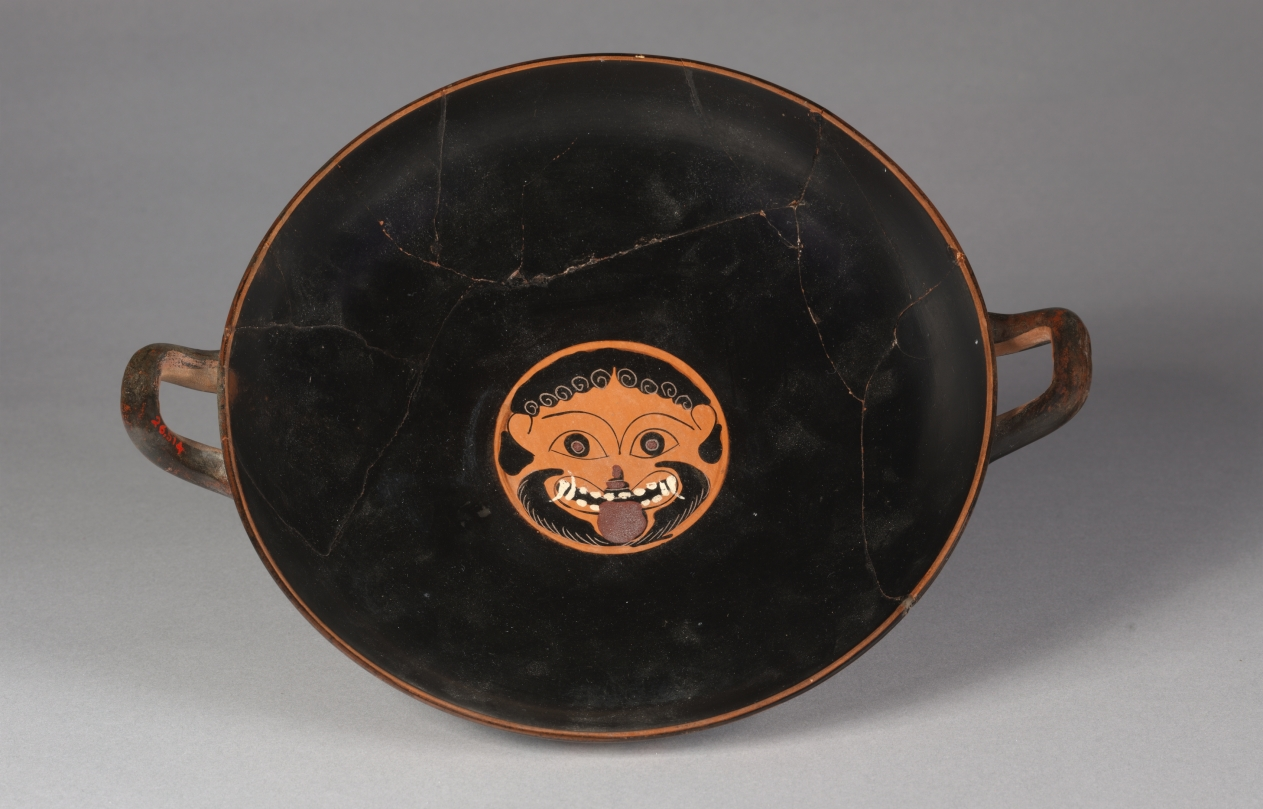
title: Black-Figure Eye Cup: Iris and Satyrs (A, B); Gorgoneion (I)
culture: Greek, Attic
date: c. 520–510 BCE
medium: ceramic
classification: Ceramic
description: Along with two large sets of eyes on its exterior, this drinking vessel also features other figures: a winged female, probably Iris, between each pair of eyes, and pairs of satyrs flanking them; a winged dolphin beneath each handle; and a frontal Gorgoneion, or face of Medusa, baring her teeth and tongue within the tondo. Although the eyes and Gorgoneion may serve to ward off evil, they also make for fluid identities while drinking, inviting drinkers to enter the mythical realm. For when tilting such cups to imbibe, drinkers confront monstrous beings while simultaneously masking their faces from others.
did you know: The eye cup takes its name from the large eyes on its exterior.